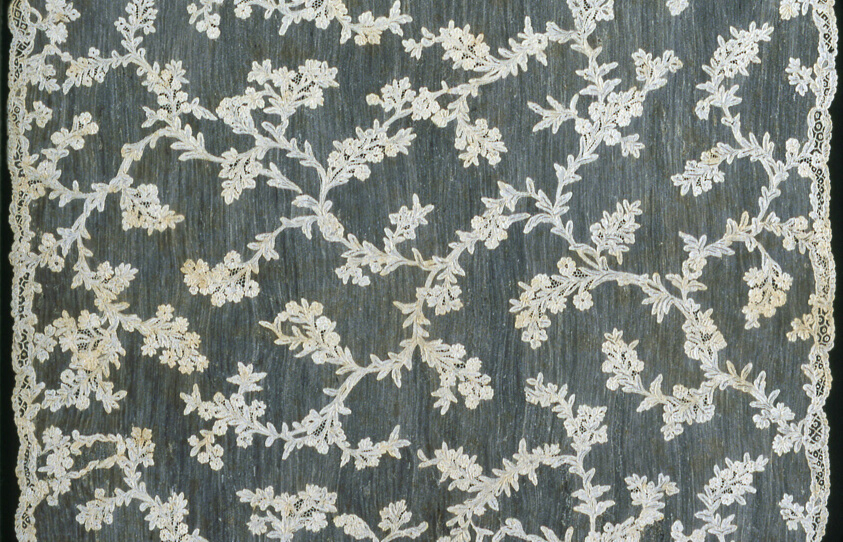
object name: Textile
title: Flounce (Incomplete)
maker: Italy, Burano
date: 1760s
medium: Linen, needle lace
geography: Burano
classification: textile; lace - needle